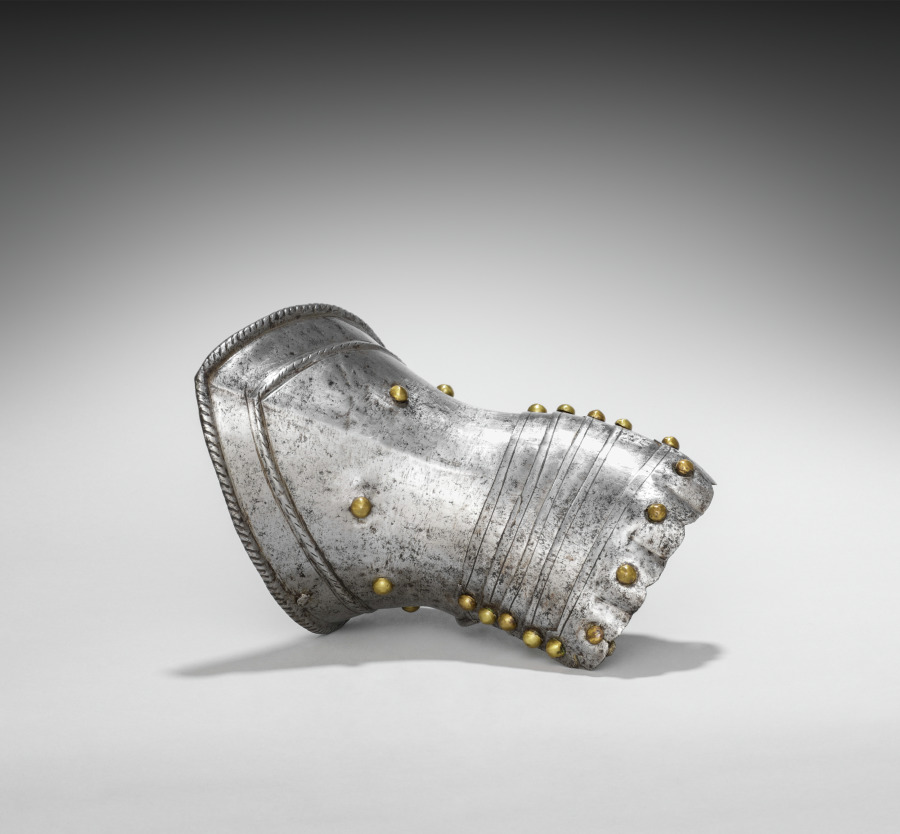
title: Gauntlet with Bell Shaped Cuff (Right)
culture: South Germany, 16th century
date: c. 1560–1580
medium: steel, leather straps, brass rivets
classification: Arms and Armor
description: This armor was developed for the joust-a sporting combat between two mounted contestants. Although all of the elements of this armor date from the same period, they are not all from the same suit. This armor is thus called "composed." It also shows the asymmetry of jousting armor. The participants rode along a wall-like barrier known as a "tilt" with their left sides facing one another. Consequently, armor on that side of the body had to be thicker. Note the large plate (grandguard) over the left shoulder for extra protection. Also, the breathing holes in the helmet were placed on the right side (farthest from an opponent's lance) to avoid injuries from splinters. The bracket attached to the right breastplate is called the lance-rest, a shock-absorbing support designed to accommodate the lance when "couched" under the right armpit.